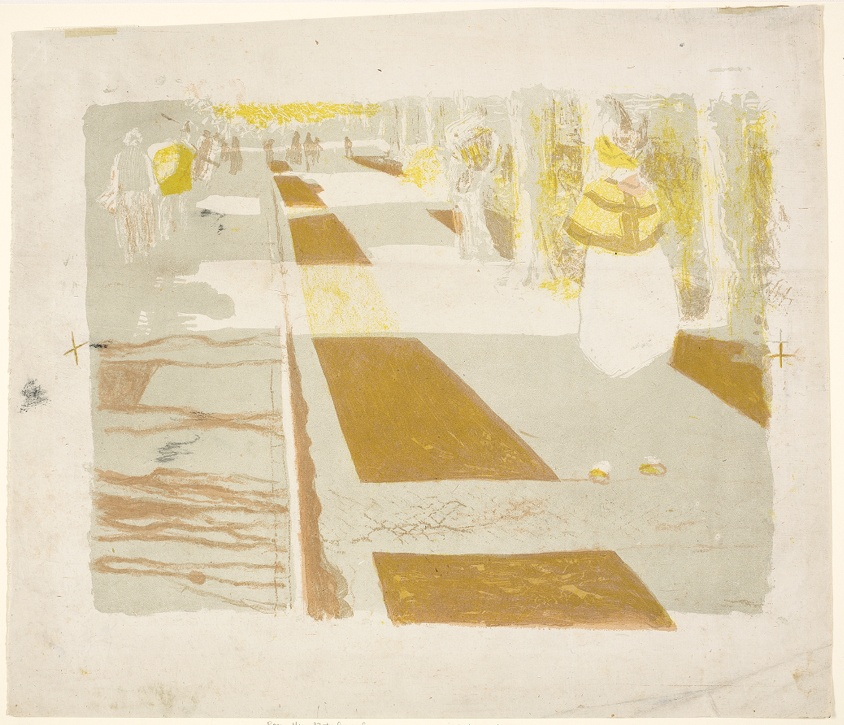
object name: Print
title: The Avenue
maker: Edouard Jean Vuillard; French, 1868-1940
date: 1899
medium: Color lithograph, with touches of dark blue pastel, on grayish-ivory laid chine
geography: France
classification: lithograph; print; prints and drawing